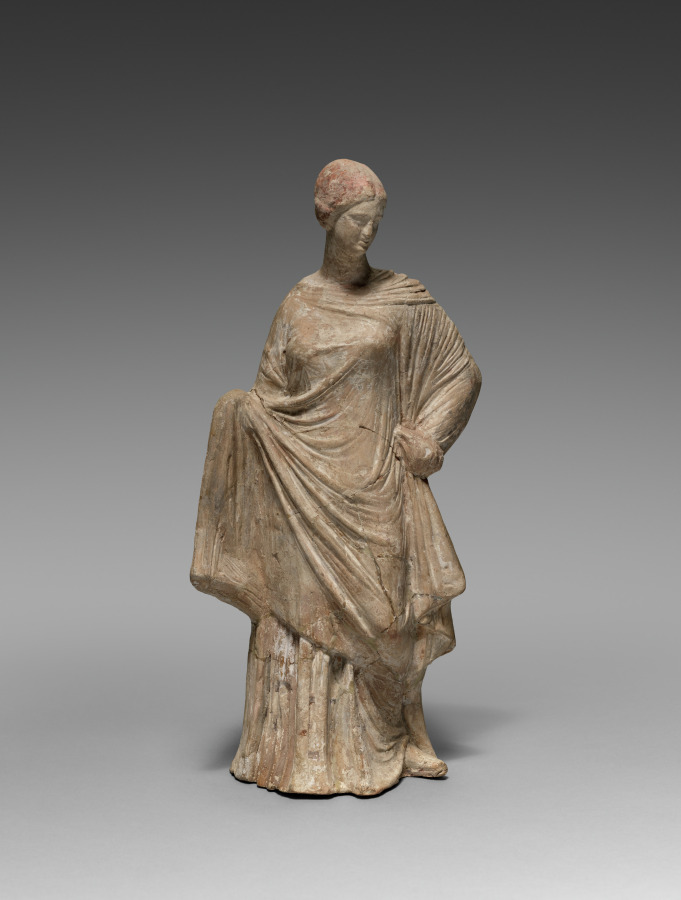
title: Figurine of Standing Woman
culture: Greece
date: 200s BCE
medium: terracotta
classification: Sculpture